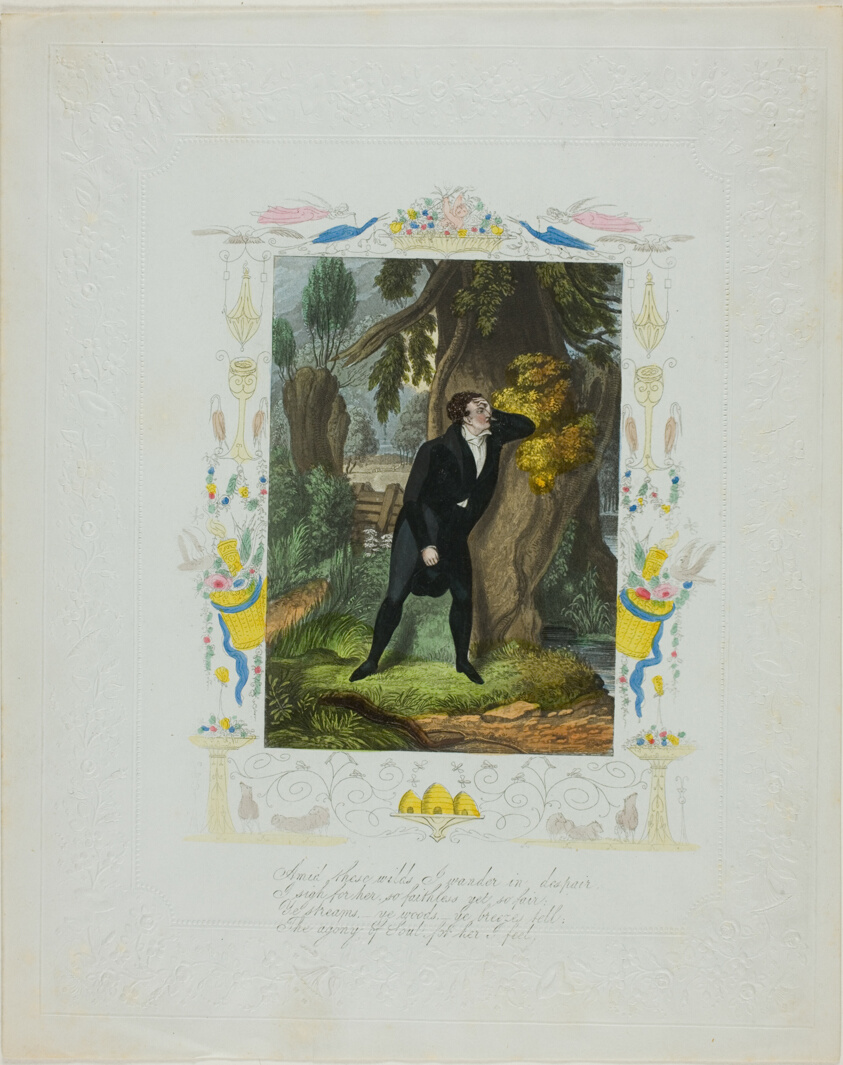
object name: Print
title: Amid These Wilds, I Wander in Despair (valentine)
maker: Unknown Artist; English, 19th century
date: c. 1850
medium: Lithograph with hand-coloring on embossed off-white wove paper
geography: England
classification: valentine; prints and drawing; print